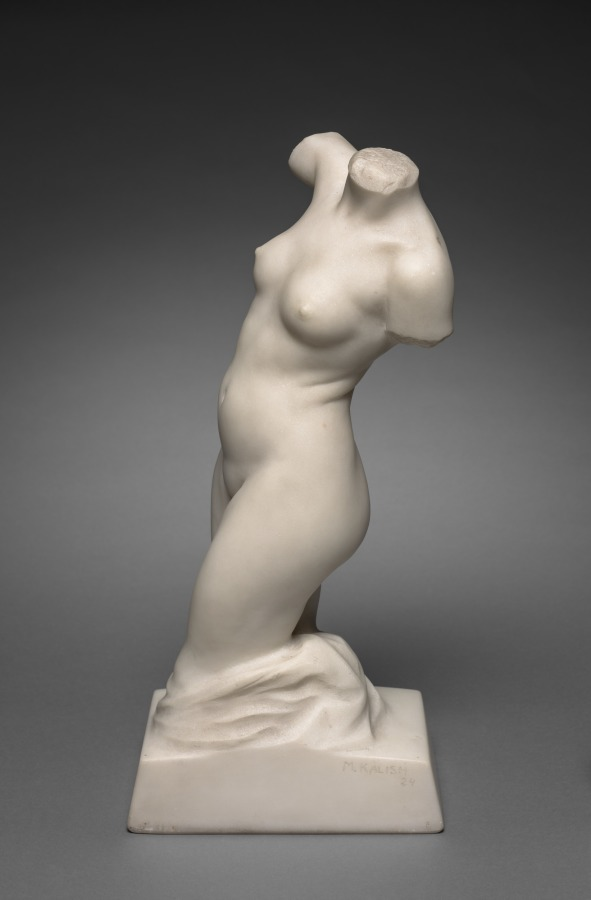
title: Torso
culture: America, Ohio, Cleveland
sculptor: Max Kalish (American, born Russian Empire [now Lithuania], 1891–1945)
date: 1924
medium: marble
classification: Sculpture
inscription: Signed on right side near side of base.: "M. Kalish 24"